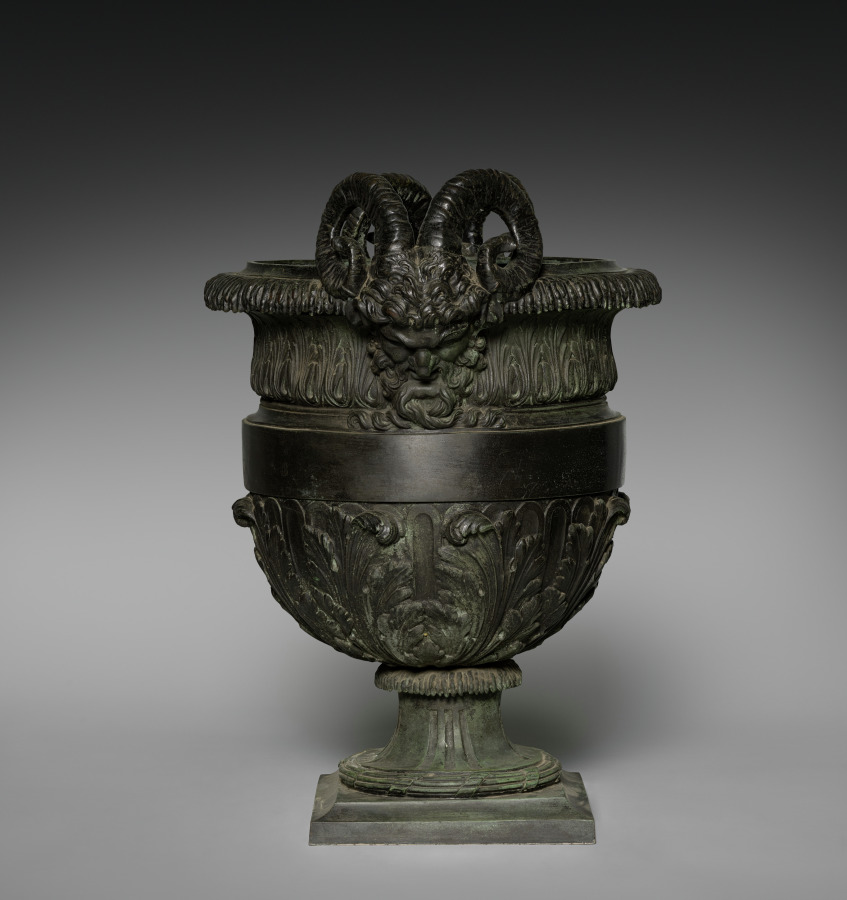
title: Urn with Satyr Heads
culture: France, 18th century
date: 1700s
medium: bronze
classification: Metalwork